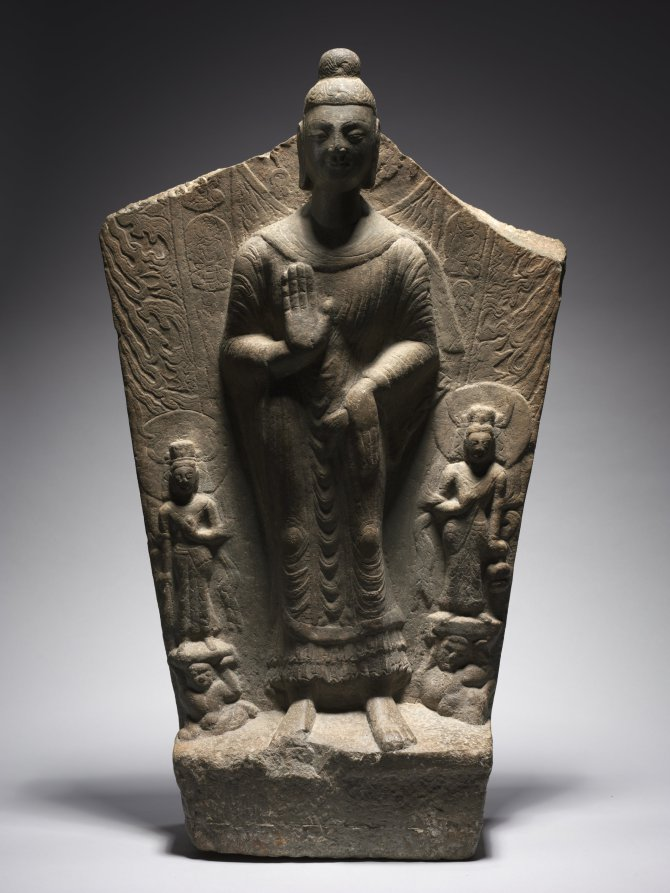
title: Stele with Maitreya and Attendants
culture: China, Northern Wei dynasty (386-534)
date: 500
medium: gray limestone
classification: Sculpture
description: Buddhist statue steles (zaoxiang bei) were commissioned and donated to be set in temples. The making of Buddhist images allowed for personal devotion and accumulation of merits, but the erection of a stele was also an act of piety or gratitude by individual donors. As indicated by the inscription on the reverse side of this stele, it was commissioned in 500 by a monk for his parents, family, and religious teachers.